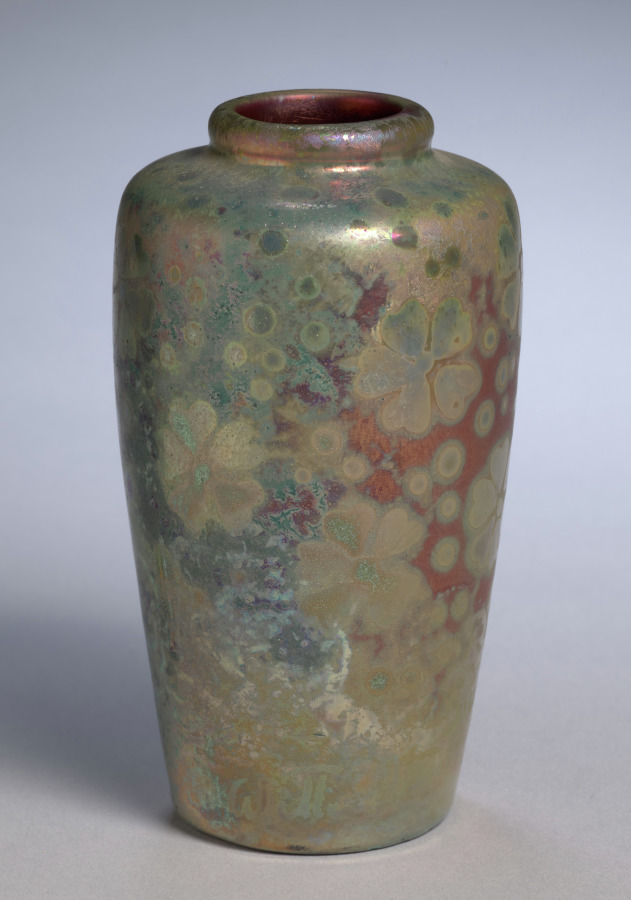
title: Vase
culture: America, Ohio, Zanesville, early 20th Century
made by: Weller Pottery (American)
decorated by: Jacques Sicard (French, 1865–1923)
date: early 1900s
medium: earthenware decorated with lustre glazes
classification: Ceramic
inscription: inscribed on side near bottom: "Weller/Sicard."